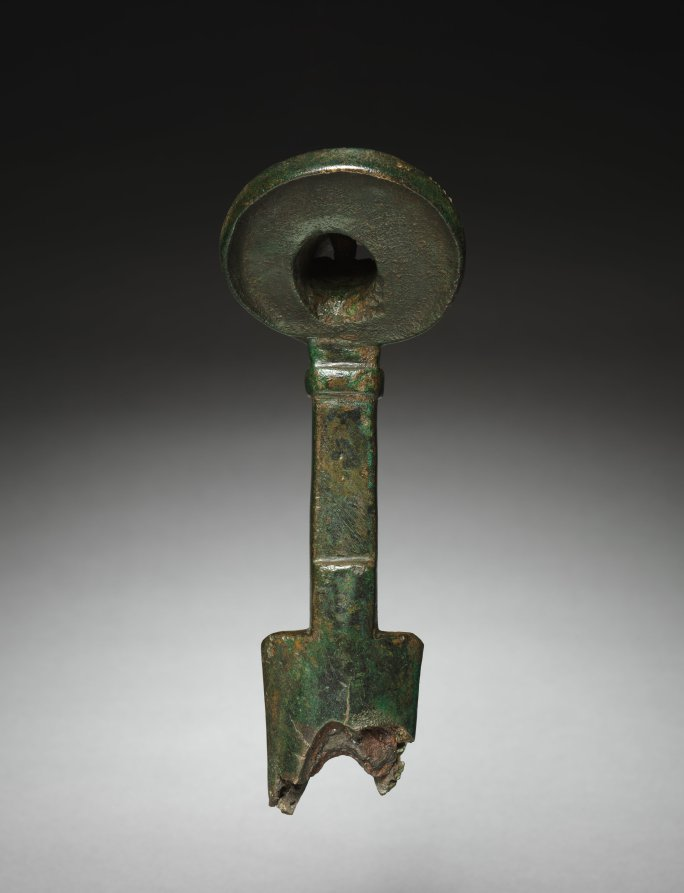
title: Sword Handle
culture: Iran, Luristan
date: 2000–1000 BCE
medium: bronze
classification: Metalwork